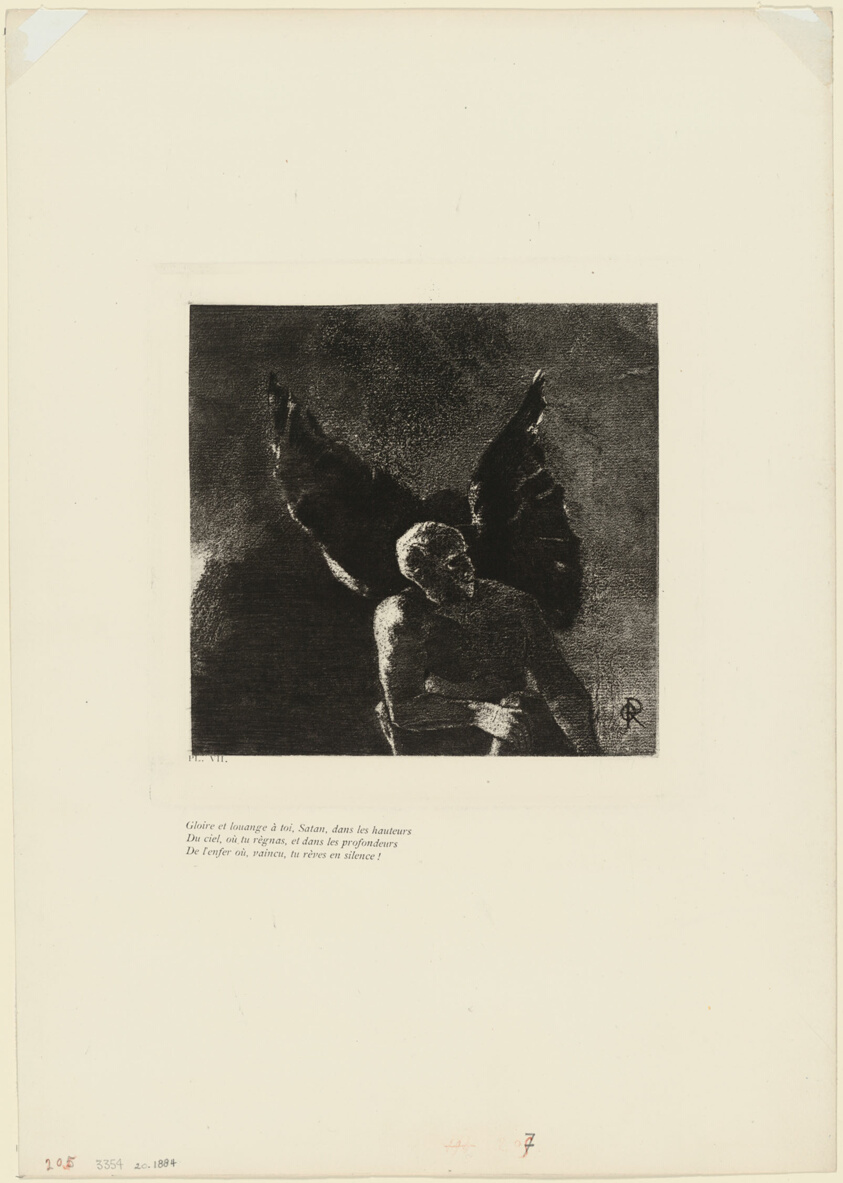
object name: Print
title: Glory and Praise to You, Satan, in the Heights of Heaven, Where You Reigned, and in the Depths of Hell, Where, Vanquished, You Dream in Silence!, plate 8 of 9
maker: Odilon Redon (French, 1840-1916)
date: 1890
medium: Photogravure made from an original drawing, in black on ivory wove paper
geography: France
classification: photogravure; reproduction; prints and drawing; print; paper